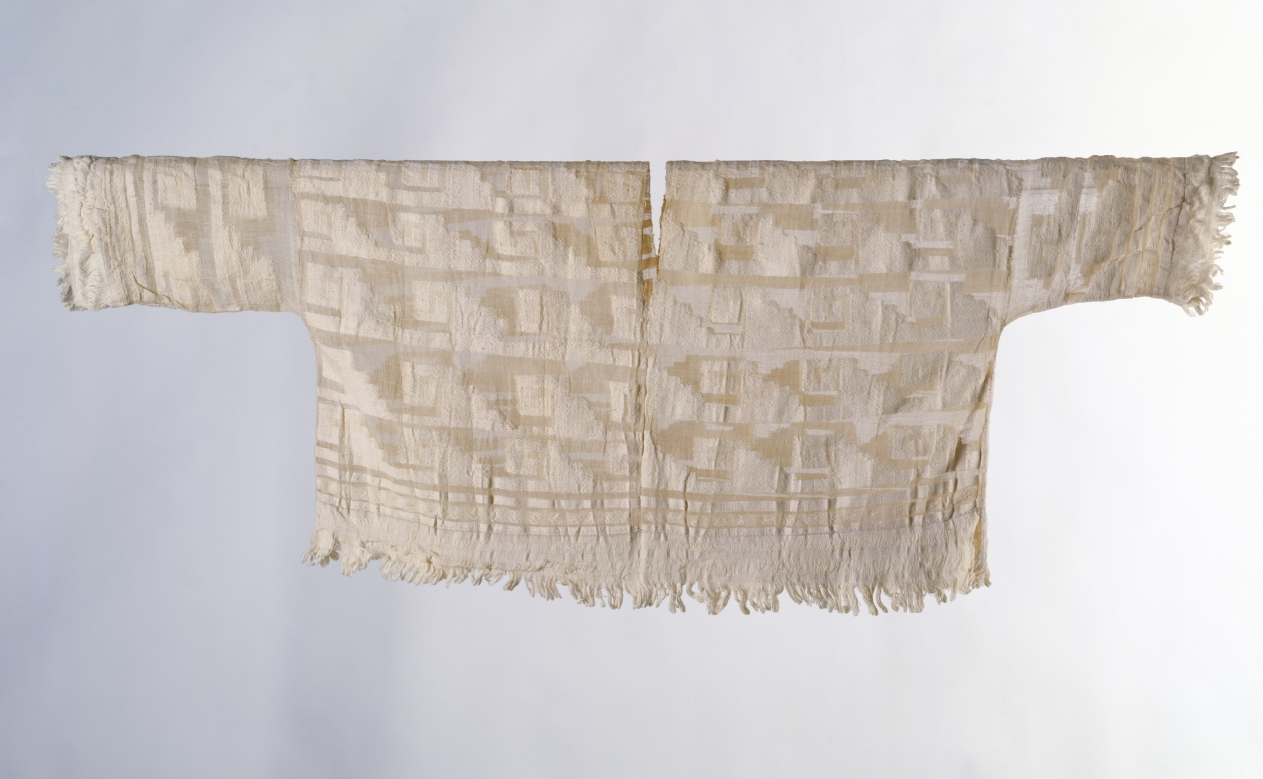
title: Tunic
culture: Peru, Chimú or Chimú-Inka, 12th-16th century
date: 1100–1532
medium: white cotton; plain weave with supplementary weft brocading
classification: Textile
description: This garment embodies an important principle of the Chimú textile aesthetic: a love of combining different textures, some dense and sculptural and others so open and airy they are nearly invisible. (The hand-spun yarns are only .1 to .2 millimeters in diameter.) It also elegantly articulates the simplified, spare visual vocabulary that the Chimú favored, here geometric motifs.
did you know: The Chimú forged an empire that thrived until the 1460s, when the Inka incorporated it into their own imperial domain.